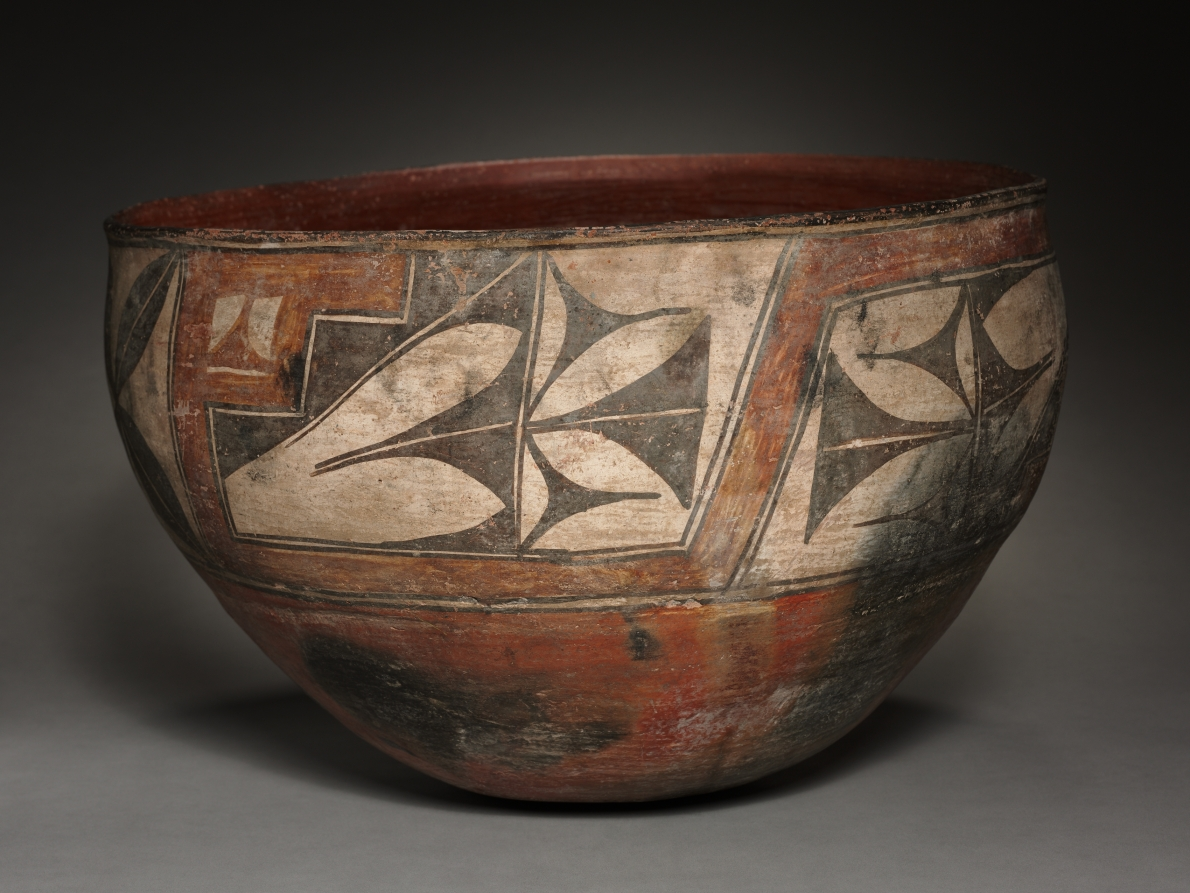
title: Dough Bowl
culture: Southwest,Pueblo, Zia, Post-Contact Period,19th century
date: 1890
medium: ceramic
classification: Ceramic